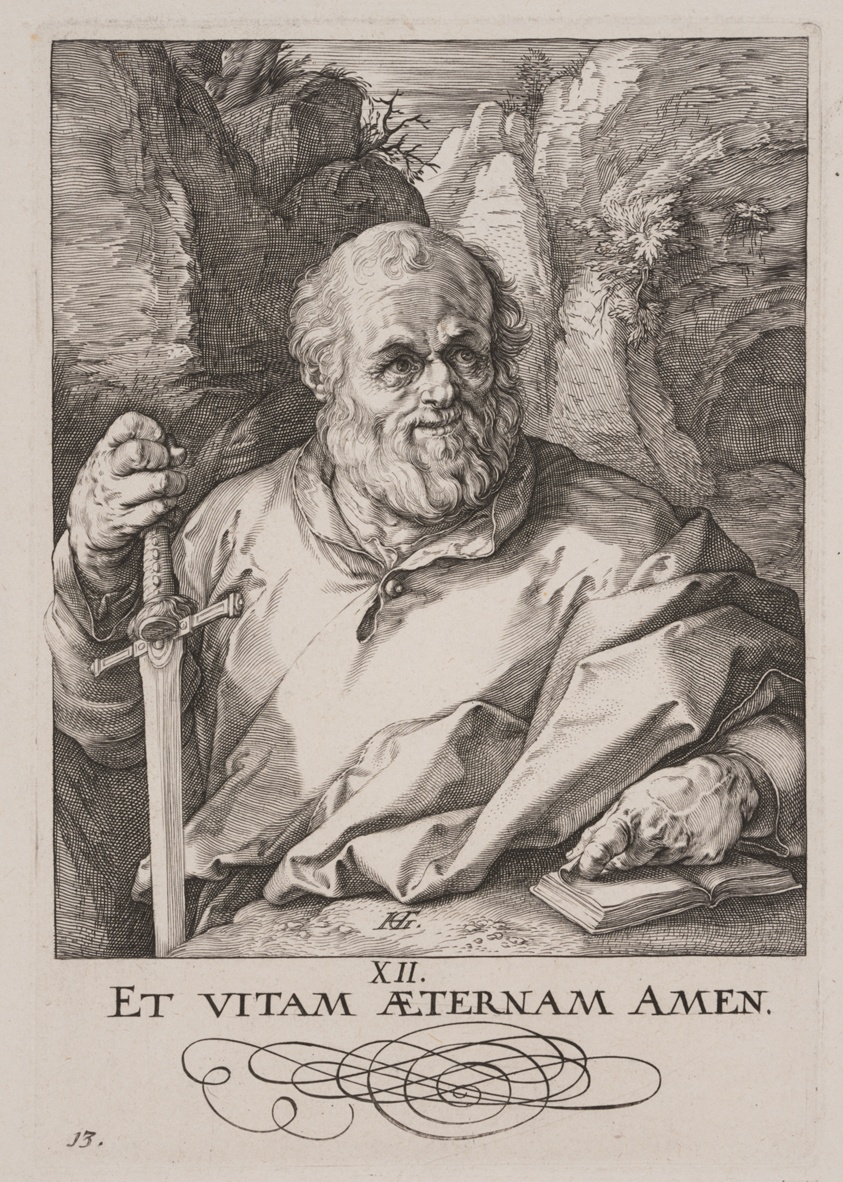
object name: Print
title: St Matthias, from Christ, the Apostles and St Paul with the Creed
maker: Hendrick Goltzius (Dutch, 1558–1617)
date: 1589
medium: Engraving on ivory laid paper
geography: Netherlands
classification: print; paper; prints and drawing; engraving